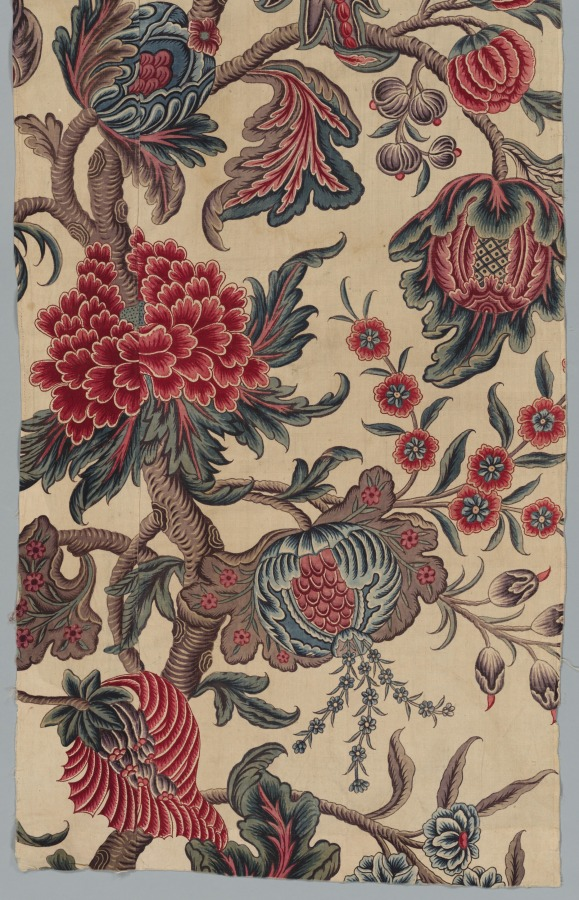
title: Strip of Woodblock Printed Linen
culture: France, late 18th century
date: c. 1785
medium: woodblock print on linen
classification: Textile